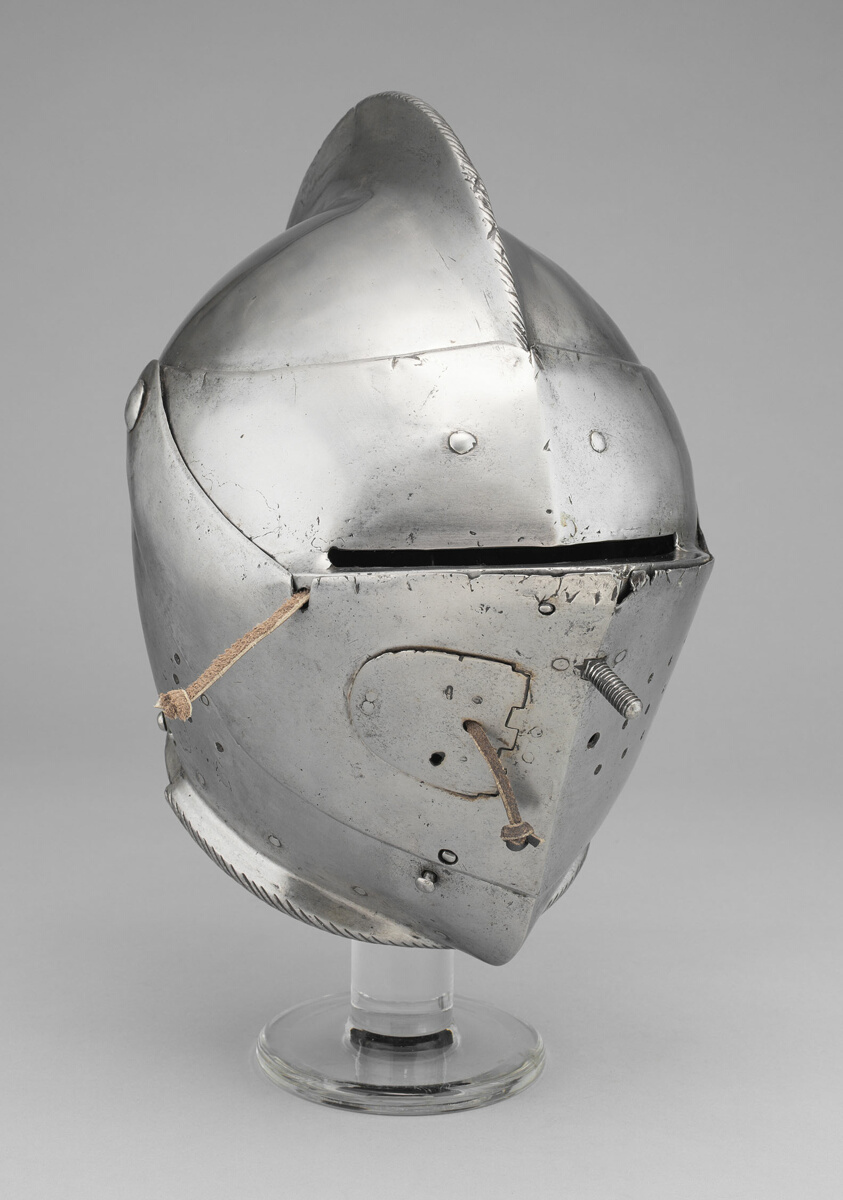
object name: Armor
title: Close Helmet for the Joust and Tourney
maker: South German; probably Augsburg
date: c. 1590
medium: Steel and leather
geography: Augsburg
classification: suit-helmet; armor; arms and armor